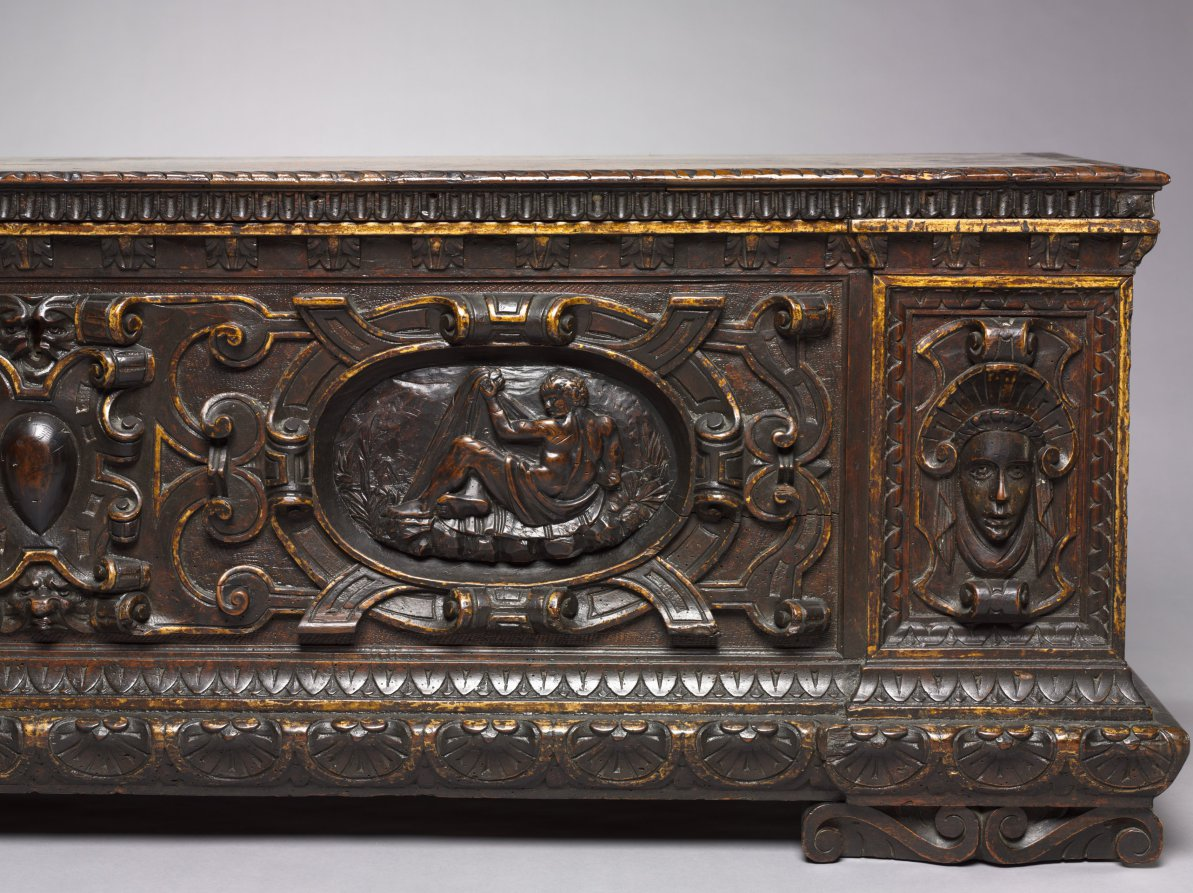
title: Cassone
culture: Italy, Venice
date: mid-1500s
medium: walnut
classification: Furniture and woodwork